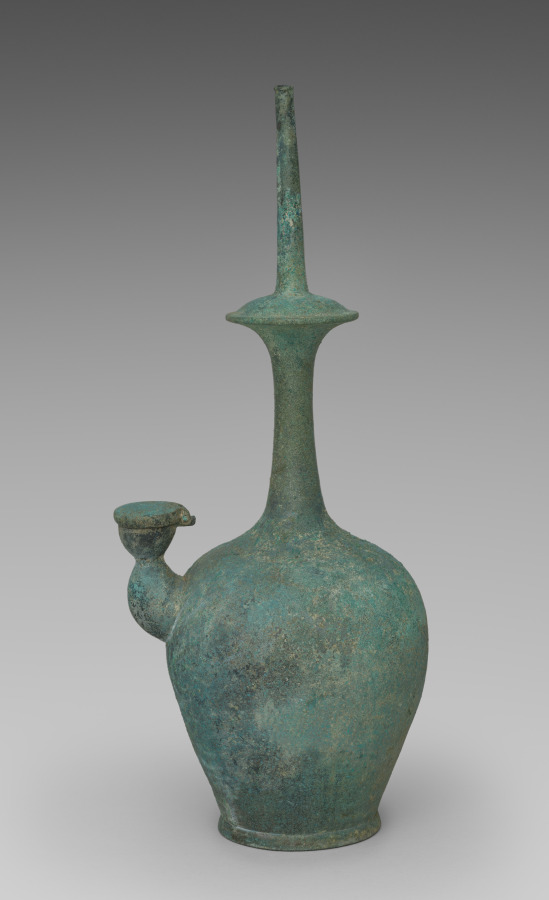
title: Water Ewer for Rituals (Kundika)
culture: Korea, Goryeo dynasty (918–1392)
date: 1100s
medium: bronze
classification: Metalwork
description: Known as kundika in Sanskrit, this distinctively shaped vessel served to purify a sacred space and to invoke a deity. In Korean Buddhist art, it appears primarily as an attribute of the Bodhisattva Avalokitesvara (Gwaneum in Korean). By the 1100s, however, the kundika was used as aristocrats’ fancy water container for everyday use.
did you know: This distinctively shaped vessel is called a kundika in Sanskrit, simply referring to a water bottle.